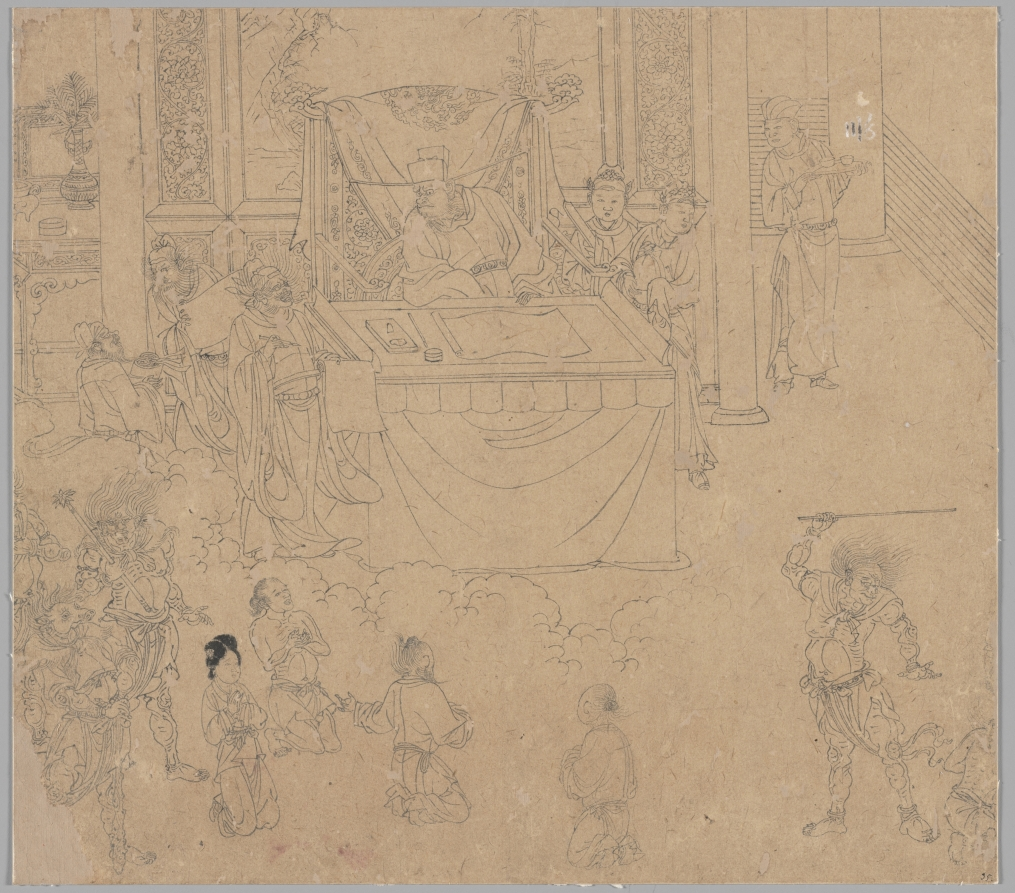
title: Album of Daoist and Buddhist Themes: Kings of Hells: Leaf 35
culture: China, Southern Song dynasty (1127-1279)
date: 1200s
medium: Album, ink on paper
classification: Painting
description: This ink line drawing belongs to a set of leafs illustrating the Ten Kings of Hell. The king here seems to render a verdict on four deceased souls: the plaintiffs are an old couple kneeling in the middle and facing the king, the accused are the younger couple to their left. The man of the latter group bares his upper body. The illustration belongs to a series of 50 ink line drawings that probably served professional artists in workshops as models for mural and silk paintings, commissioned by temples and monasteries.